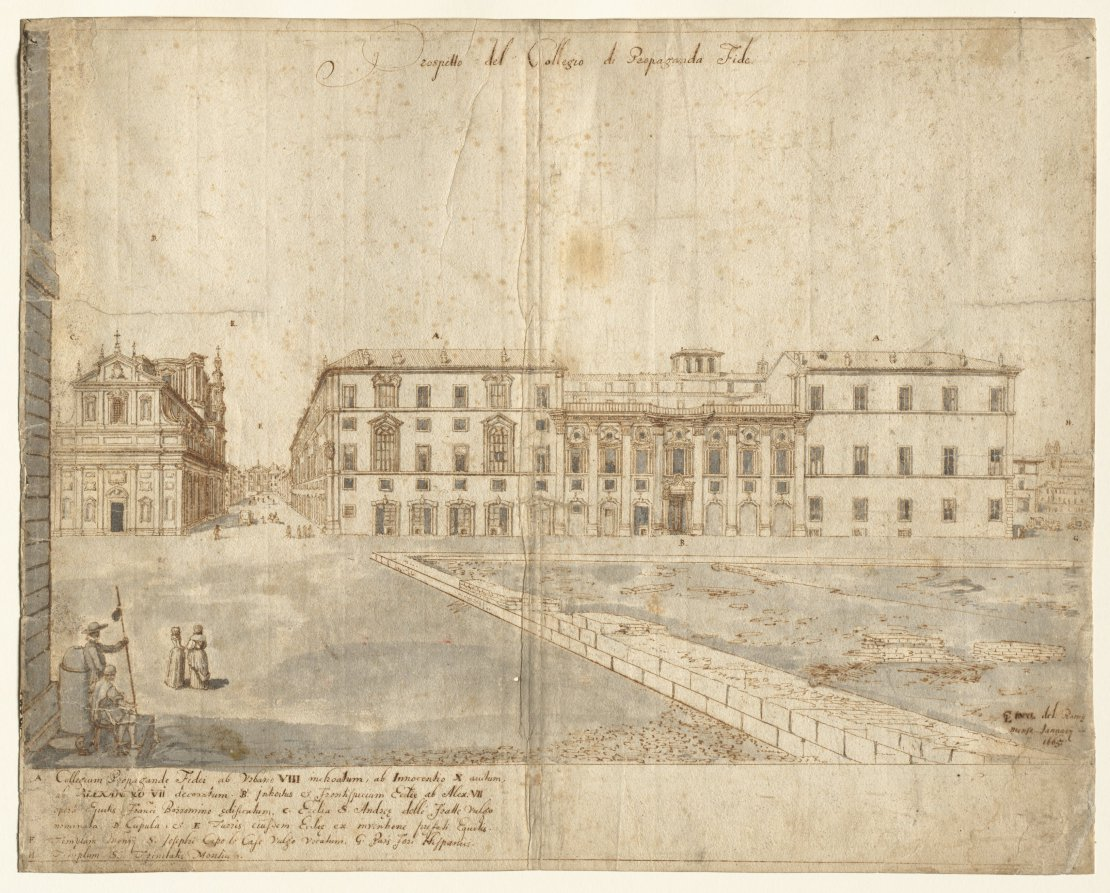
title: Eighteen Views of Rome: The Collegio di Propaganda Fide (recto)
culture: Flanders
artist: Lievin Cruyl (Flemish, c. 1640-c. 1720)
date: 1665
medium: pen and brown ink and brush and gray wash over graphite; framing lines in brown ink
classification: Drawing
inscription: signed, lower right, in brown ink: [artist's monogram: LC] RVYL del: Romæ / mense Januarij / 1665. ; by artist, upper center, in brown ink: Prospetto del Collegio di Propaganda Fide. ; by artist, throughout composition, in brown ink: [the letters A-H] ; by artist, lower left, in brown ink: A. Collegium Propagandæ Fidei ab Urbano VIII inchoatum, ab Innocentio X auctum, / ab ALEXAN[D]RO VII decoratum. B. Introitus et Frontispicium Eccliæ ab Alex: VII / operâ Equitis Frañci Borrommo edificatum. C. Ecclia S. Andreæ dellé Fratte vulgo / nominata. D. Cupula , et E Turris eiusdem Eccliæ ex inventione prefati Equitis. / F. Templum Mon~rij S. Josephi Capo le Case vulgo vocatum. G. Pars Fori Hispanici. H. Templum SS. Trinitiatis Montium.